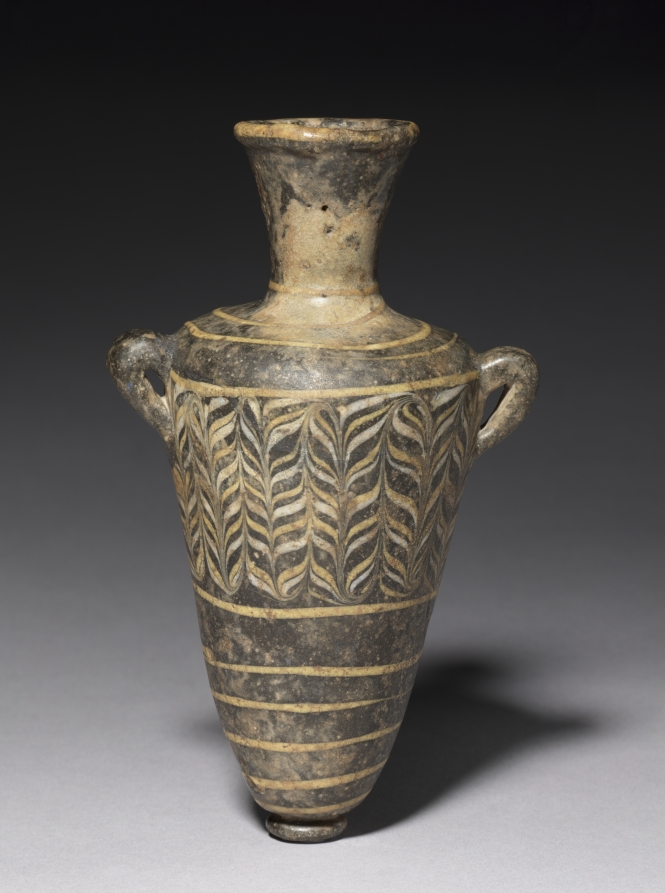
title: Unguent Bottle (Amphoriskos)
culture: Egypt, New Kingdom (1540–1069 BCE), Dynasties 18–19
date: 1549–1296 BCE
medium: glass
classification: Vessels